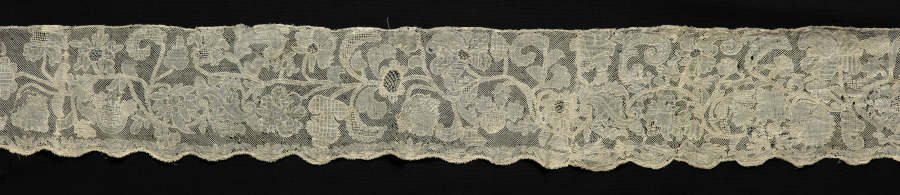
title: Flounce for Alb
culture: Unassigned, 1700s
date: 1700s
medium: Linen: needle lace (drawnwork) and embroidery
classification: Lace